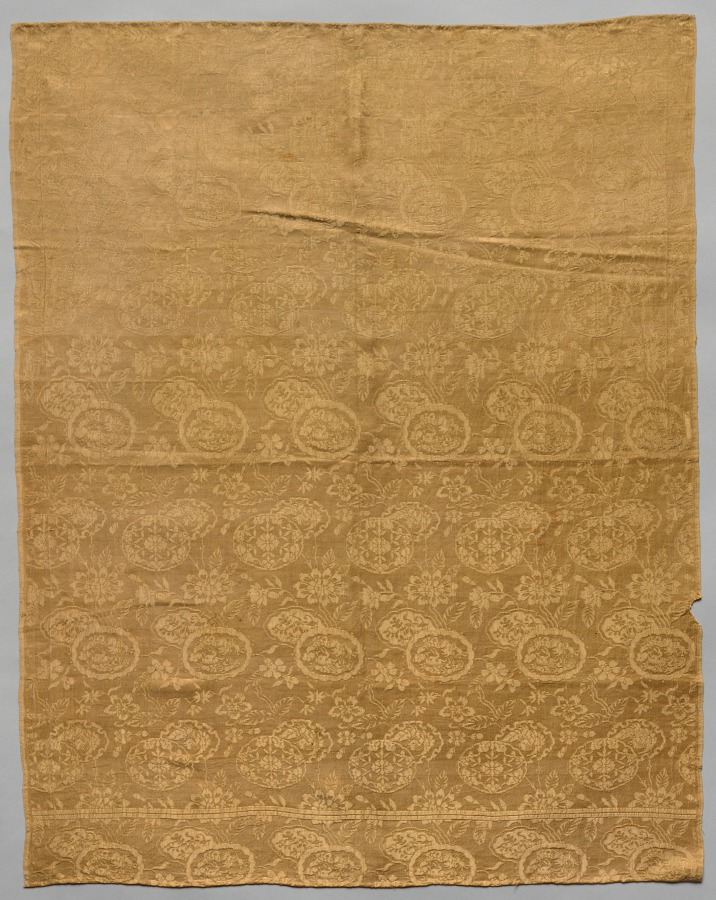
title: Fragment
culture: China, 19th century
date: 1800s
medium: silk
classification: Textile